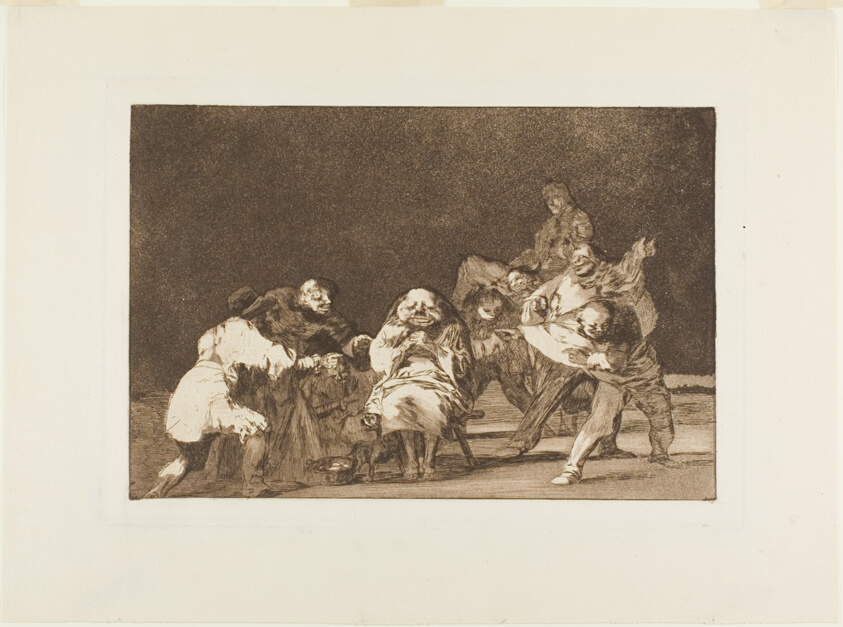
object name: Print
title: He who does not like thee will defame thee in jest, plate 17 from Los Proverbios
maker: Francisco José de Goya y Lucientes (Spanish, 1746-1828)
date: 1815/24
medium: Etching and burnished aquatint printed in sepia ink on ivory wove paper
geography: Spain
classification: etching; print; prints and drawing